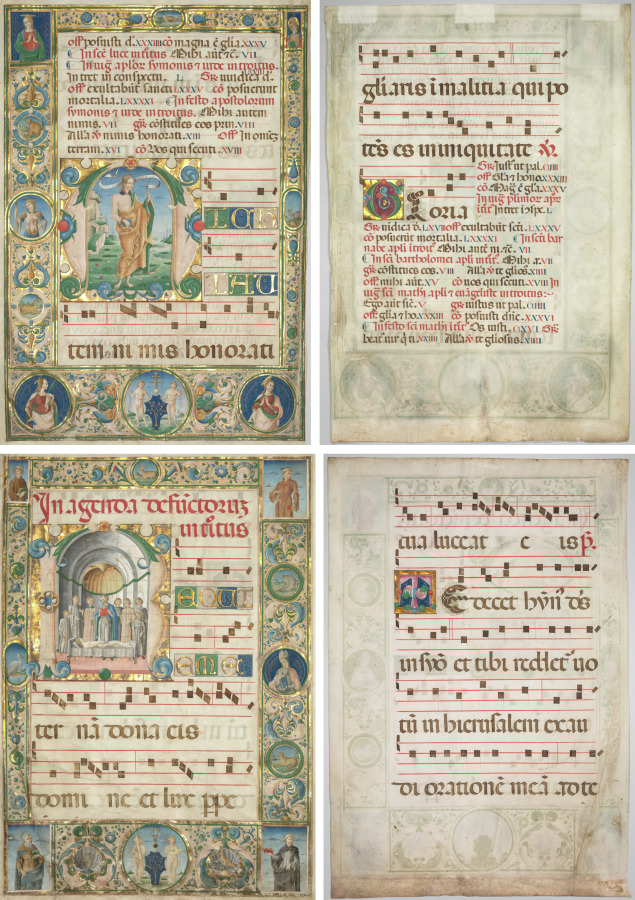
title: Pair of Graduals: Initial (M) with St. Andrew (recto) and Mass for the Dead (recto)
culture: Italy, Ferrara, 15th century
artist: Jacopo Filippo d' Argenta (Italian, 1501)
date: c. 1480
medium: ink, tempera, and gold on parchment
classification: Manuscript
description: This leaf was excised from a volume of a large set of choral books known to have been commissioned by Bartolomeo delle Rovere for Ferrara Cathedral. Delle Rovere, nephew of Pope Sixtus IV, was the Bishop of Ferrara from 1474 to 1494 and his arms appear in the rondel at the bottom of the page-a shield bearing an oak tree (rovere in Italian) surmounted by a patriarchal cross, the symbol of his rank and authority. Payment records indicate that Argenta worked on the choir books for Ferrara Cathedral from 1478 to 1486. The initial M introduces the chant for the Introit (introduction) to the mass for the Feast of Saint Andrew, celebrated on November 30th. This date also marks the beginning of the Advent season (leading to Christmas) in the liturgical calendar.